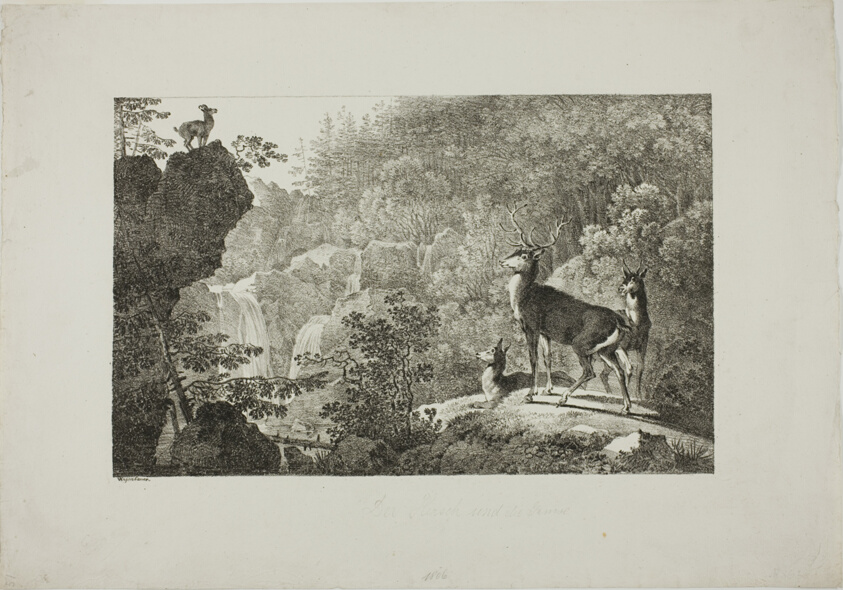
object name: Print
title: The Stag and the Chamois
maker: Maximilian Josef Wagenbauer (German, 1774-1829)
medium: Lithograph in black on paper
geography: Germany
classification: lithograph; print; prints and drawing